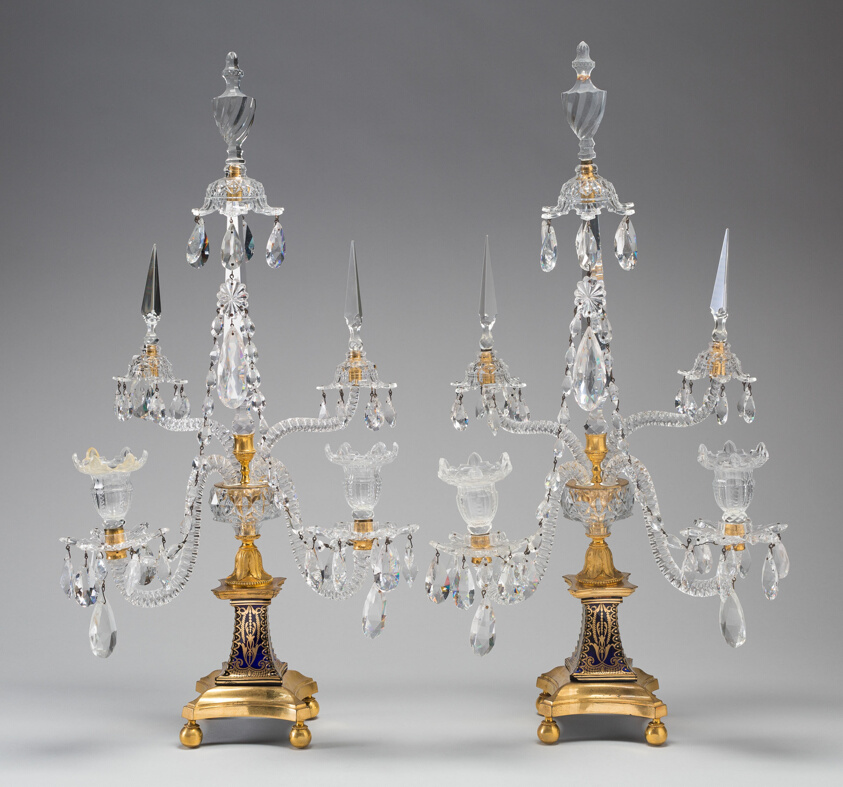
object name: Glass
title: Two Candelabra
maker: England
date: 1780–1800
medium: Clear and blue glass, gilding and bronze mounts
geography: England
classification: candleholder - candelabra; lighting device; furniture; european decorative arts; glass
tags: furniture